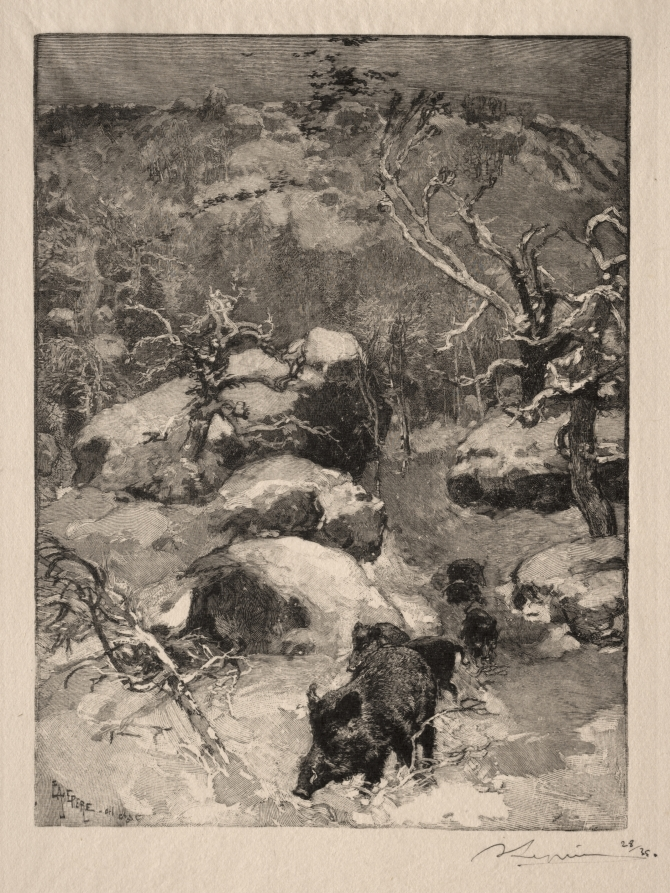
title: Roche Cuvier Chatillon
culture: France, 19th century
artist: Auguste Louis Lepère (French, 1849–1918)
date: 1887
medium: wood engraving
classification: Print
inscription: On block, lower left corner: "Lapère del. sc"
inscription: signed in ink: "28/35"